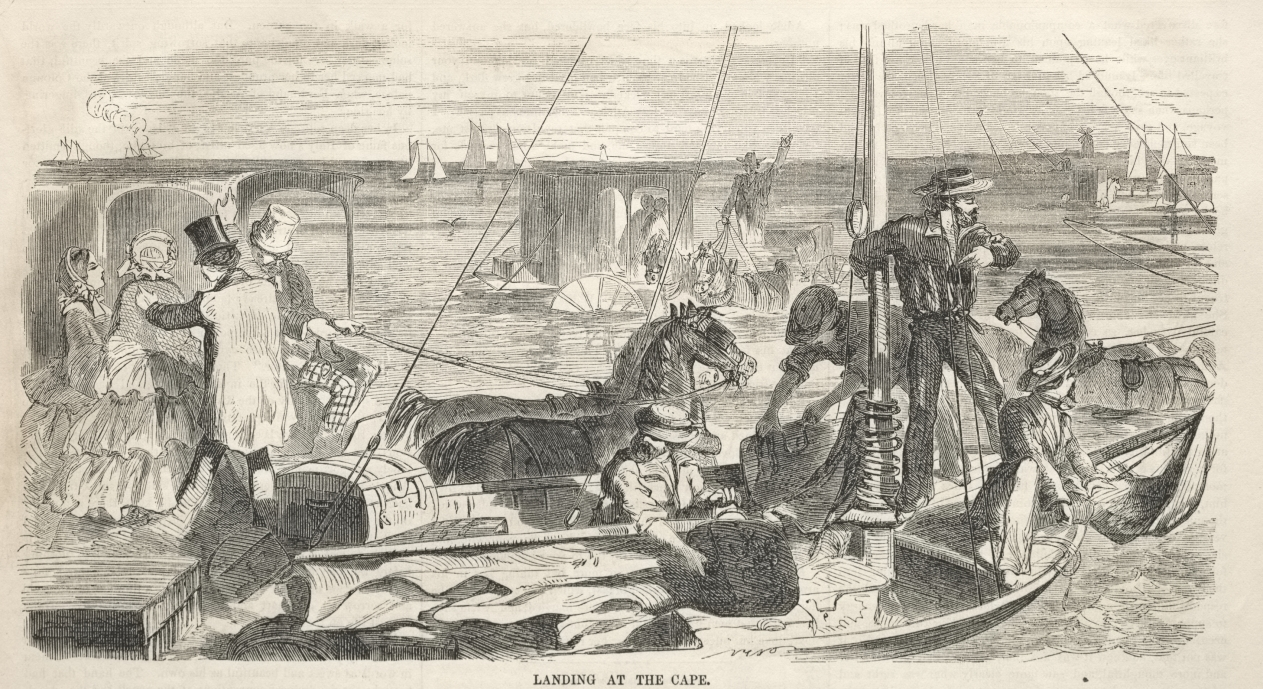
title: Camp Meeting Sketches: Landing at the Cape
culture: America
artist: Winslow Homer (American, 1836–1910)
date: 1858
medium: wood engraving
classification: Print